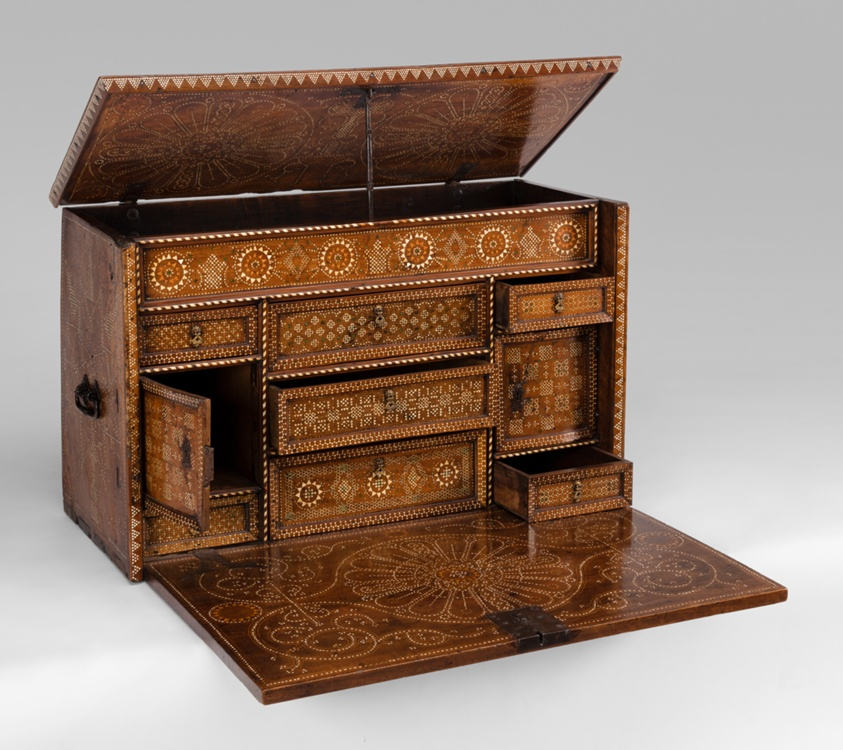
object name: Furniture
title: Writing Cabinet (Escritorio)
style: Islamic, hispano-moresque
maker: Spanish, possibly Granada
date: 1500/50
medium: Walnut, boxwood, bone, iron, copper alloy, and gilding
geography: Granada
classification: furniture; islamic; decorative arts; furnishings; furnishings (transportable); inlay; writing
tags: geometric